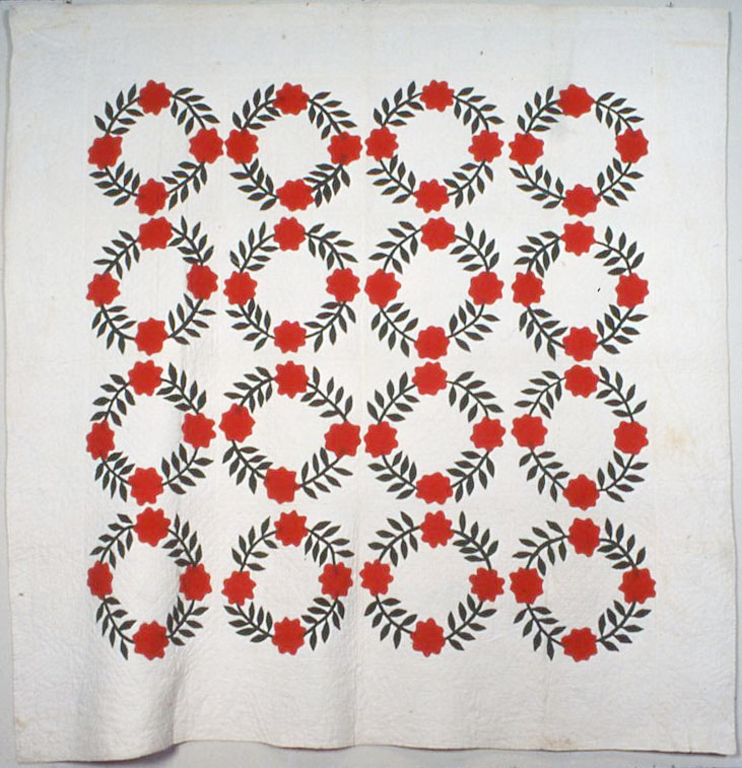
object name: Textile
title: Bedcover (Rose Wreath)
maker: United States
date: c. 1845/50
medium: Cotton, plain weave, pieced; appliquéd with cotton, plain weave; quilted; backed with cotton, plain weave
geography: United States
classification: textile; needlework - quilt